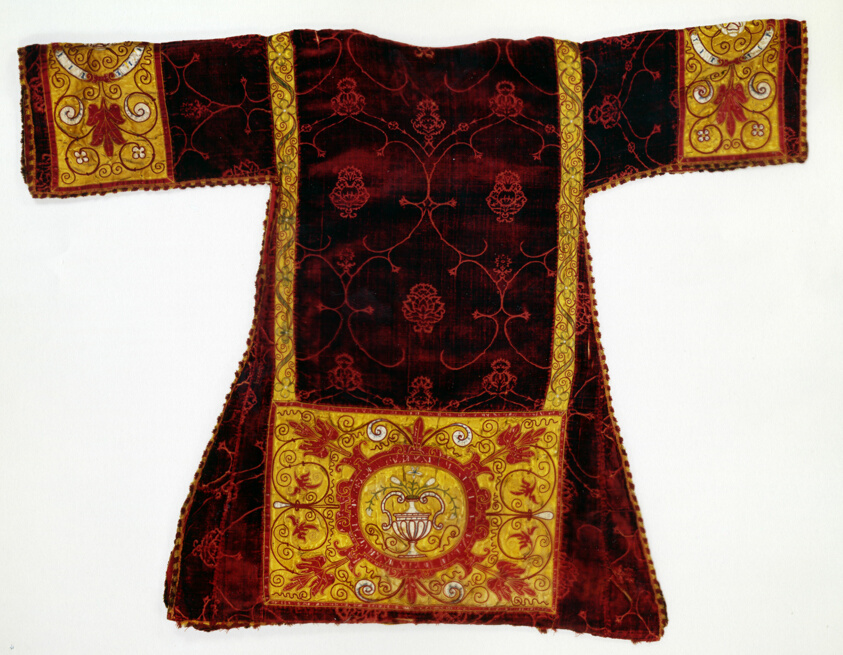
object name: Textile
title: Dalmatic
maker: Italy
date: Late 15th century; Apparels later due to satin binding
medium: Silk, warp-float faced 4:1 satin weave with supplementary pile warps forming cut voided velvet; apparels: silk, warp-float faced 7:1 satin weave; appliquéd with warp-float faced 7:1 satin weave; painted; embroidered and appliquéd with silk in laid work and couching; fringe: silk, warp faced plain weave with extended ground weft fringe; lining: cotton, warp-float faced 4:1 satin weave; underlining: hemp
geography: Italy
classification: textile; needlework (visual works); weaving - velvet; costume; liturgical